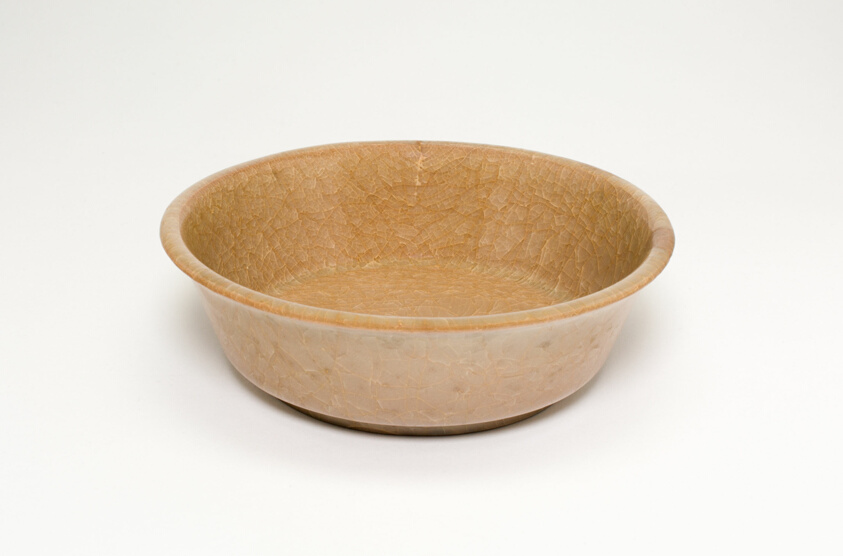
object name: Vessel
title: Bowl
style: Chinese (culture or style)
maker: China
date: Southern Song dynasty (1127–1279), 13th century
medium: Guan ware; glazed stoneware (misfired)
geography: China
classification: bowl; stoneware; dish (vessel); asian art; ceramics; vessel